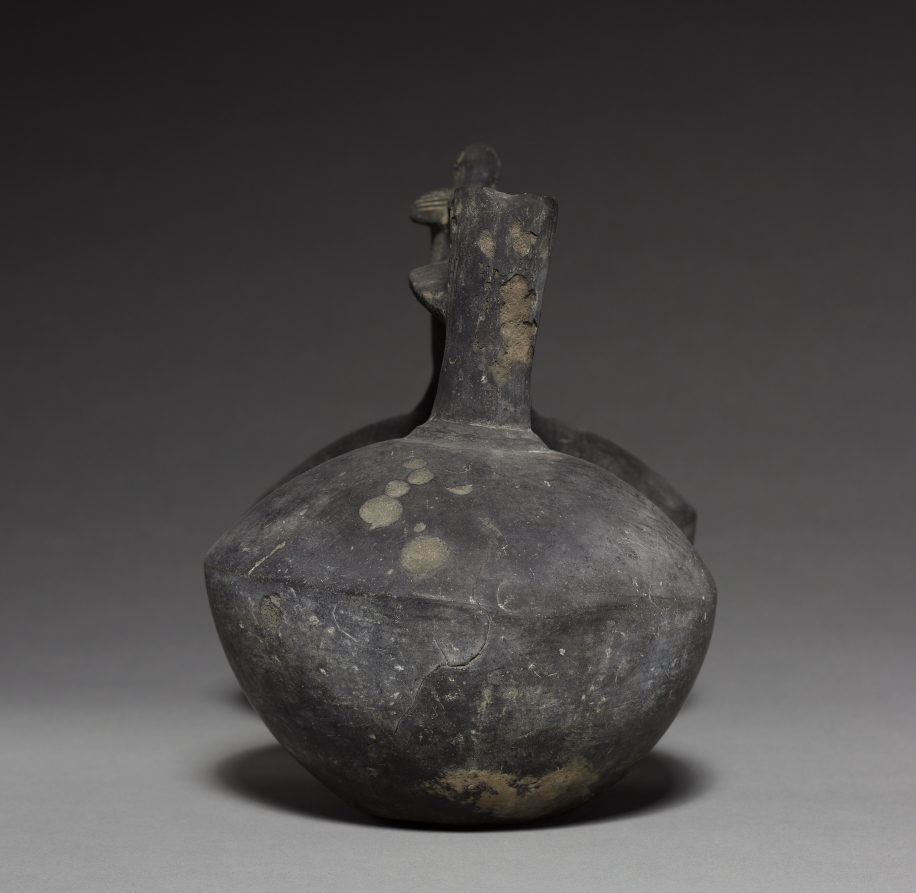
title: Bottle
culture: Peru, Chimú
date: 1300–1400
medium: pottery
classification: Ceramic